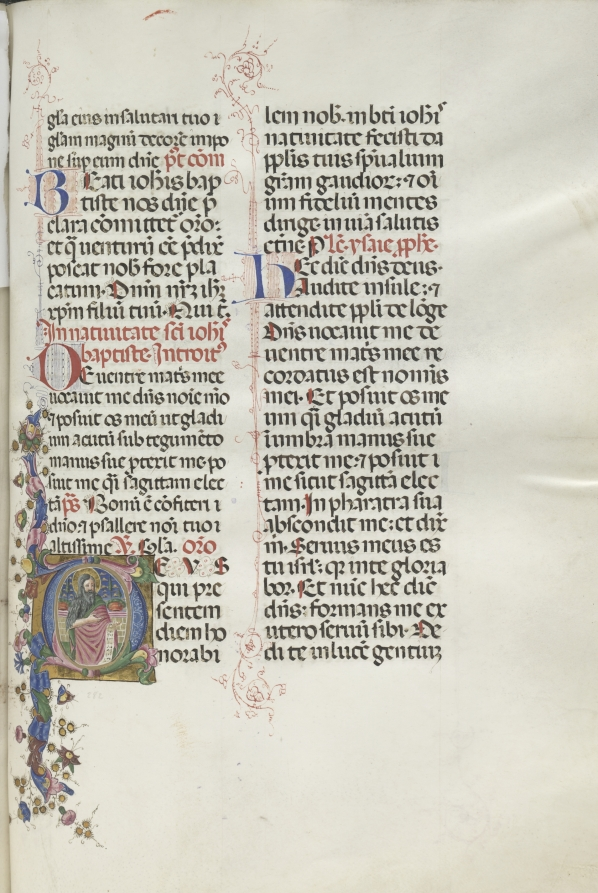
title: Missale: Fol. 287: Saint John the Baptist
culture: Italy, Perugia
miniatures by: Bartolommeo Caporali (Italian, c. 1420–1503)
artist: assisted by Giapeco Caporali (Italian, d. 1478)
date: 1469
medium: ink, tempera and burnished gold on vellum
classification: Bound Volume